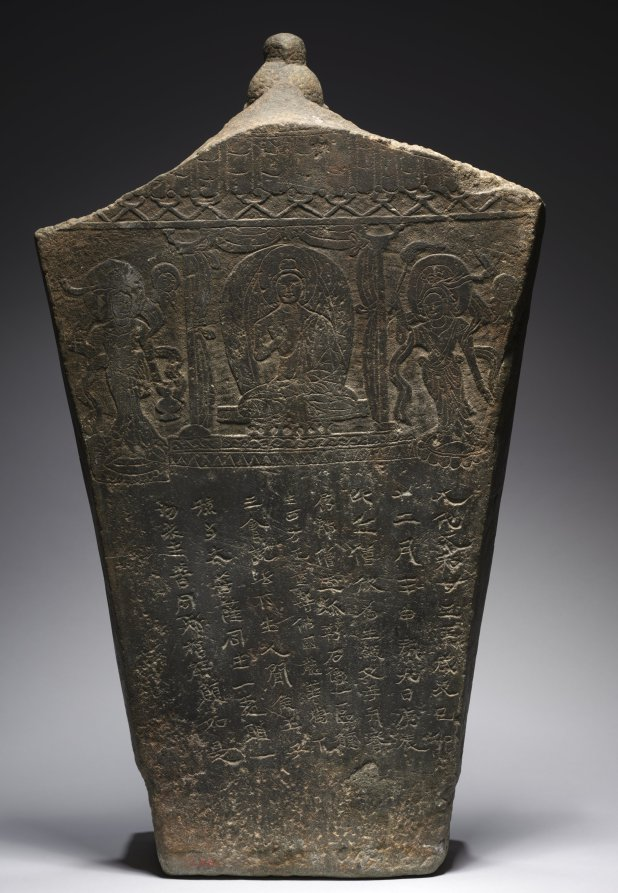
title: Stele with Maitreya and Attendants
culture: China, Northern Wei dynasty (386-534)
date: 500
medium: gray limestone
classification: Sculpture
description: Buddhist statue steles (zaoxiang bei) were commissioned and donated to be set in temples. The making of Buddhist images allowed for personal devotion and accumulation of merits, but the erection of a stele was also an act of piety or gratitude by individual donors. As indicated by the inscription on the reverse side of this stele, it was commissioned in 500 by a monk for his parents, family, and religious teachers.